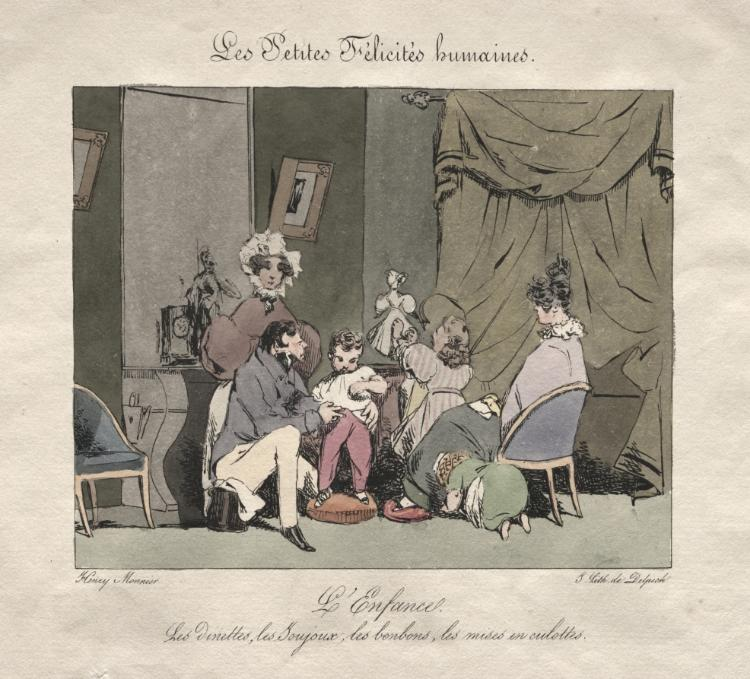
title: Childhood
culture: France, 19th century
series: Little Human Felicities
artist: Henry Bonaventure Monnier (French, 1805–1877)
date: 1800s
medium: color lithograph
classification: Print